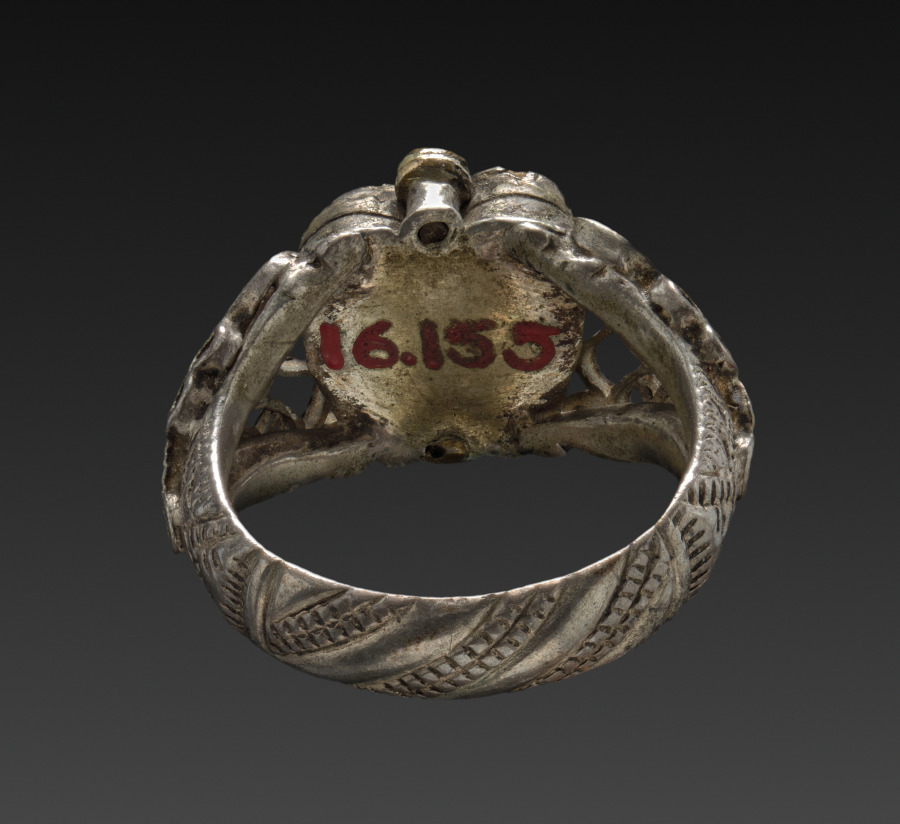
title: Peasant's Ring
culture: Germany, Bavaria, 18th century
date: 1700s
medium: silver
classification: Jewelry